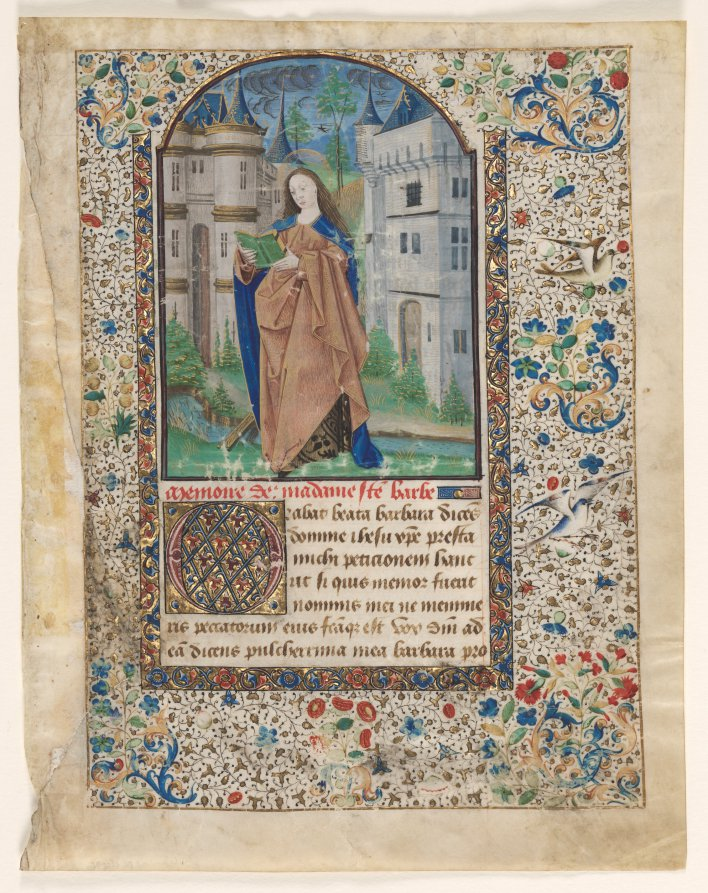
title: Leaf from a Book of Hours: St. Barbara (2 of 2 Excised Leaves)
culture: France, Eastern France or Paris (?), 15th century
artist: Master of Jacques de Luxembourg (French)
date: c. 1465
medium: ink, tempera and gold on vellum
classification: Manuscript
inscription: Memore de madame ste barbe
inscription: Oratio: Omnipotens sempiterne Deus qui… corpus beatae Barbare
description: Saint Barbara was popular in France, known for being imprisoned in a tower by her father and living as a hermit. In piety, she asked builders to construct her three windows to symbolize the Holy Trinity of the Father, Son, and Holy Spirit. Her father, enraged by her conversion to Christianity, killed her, after which he was struck by lightning from heaven. She was seen as a protector from sudden death, a common medieval concern, and the patron saint of architects and builders. The text on this leaf is in French, as opposed to Latin.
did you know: The owner of a book of hours was intended to stop eight times a day and read the appropriate devotional text.